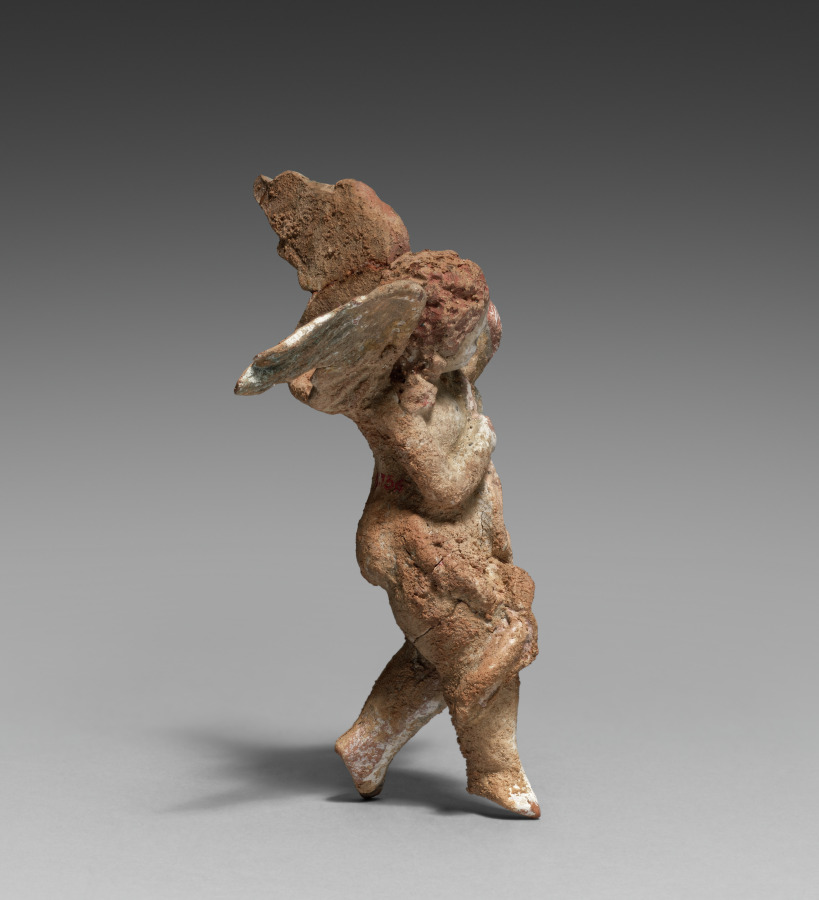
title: Figurine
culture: Greece, Myrina, Hellenistic period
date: 300–100 BCE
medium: terracotta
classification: Sculpture